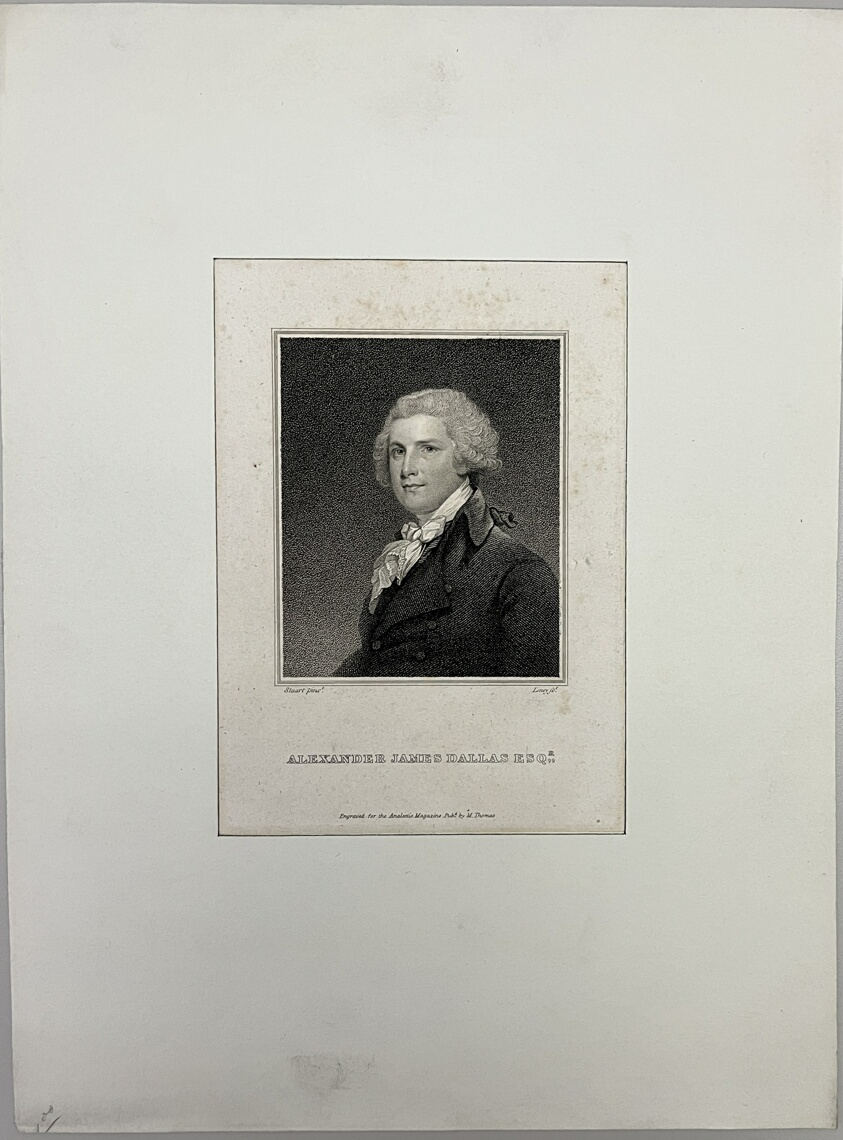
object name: Print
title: Alexander James Dallas Esquire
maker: Possibly William Satchwell Leney (English, active in America and Canada, 1769-1831); published by Moses Thomas (American, 1856-1934); after Gilbert Stuart (American, 1755-1828)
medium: Stipple etching on paper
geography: England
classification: reproduction; print; prints and drawing